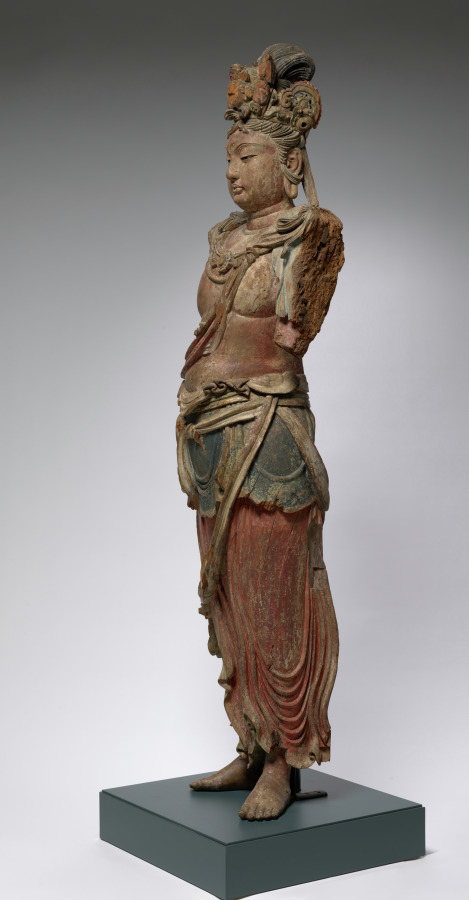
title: Eleven-Headed Guanyin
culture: China, late Northern Song dynasty (960-1127) - Jin dynasty (1115-1234)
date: 1100–1200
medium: wood with polychromy and cut gold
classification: Sculpture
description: The bodhisattva is an enlightened being dedicated to the spiritual awakening of all beings. The compassionate bodhisattva Guanyin, in a variety of manifestations, is probably the most popular deity of worship in Chinese Buddhism. In the Esoteric Buddhist form shown here, this standing Guanyin has a total of eleven heads, with smaller ones above the principal head. The uppermost head represents the Buddha Amitabha, to whom he is closely related. The eleven heads symbolize the Buddha’s steps on the path to enlightenment.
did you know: This Guanyin is carved from a single block of willow (genus Salix sp.).